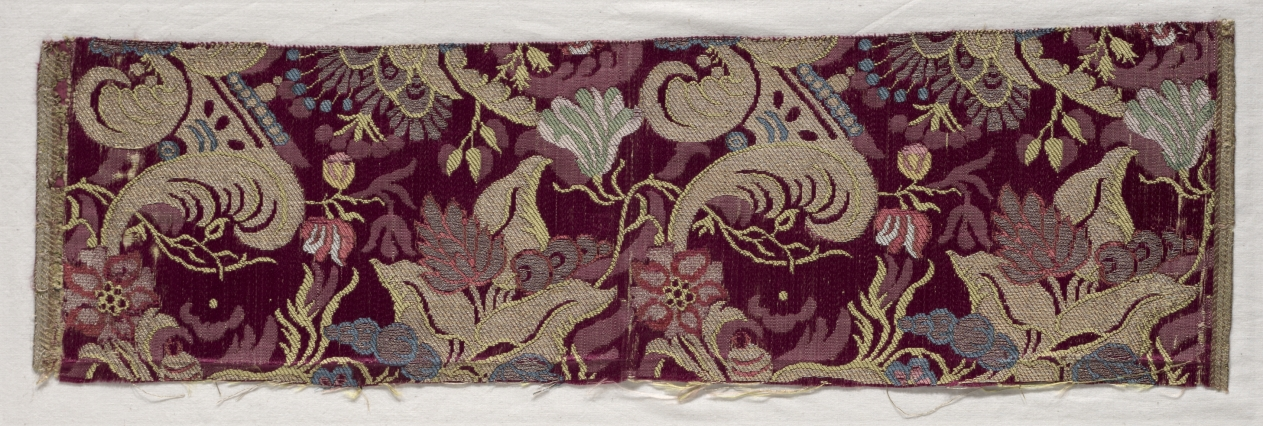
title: Length of Textile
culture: France or Italy, early 18th century, period of Louis XIV (1643-1715)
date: c. 1700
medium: brocade; silk, gold and silver threads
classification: Textile